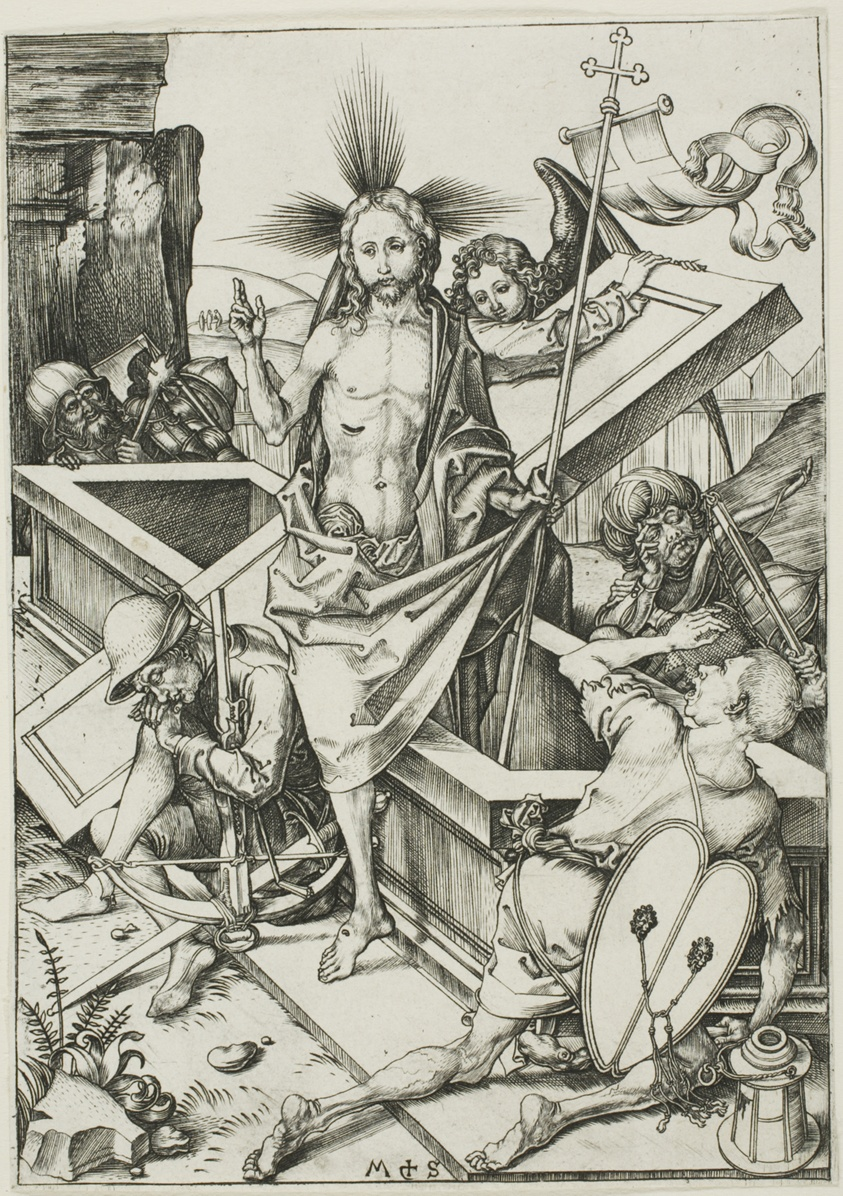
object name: Print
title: The Resurrection, from The Passion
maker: Martin Schongauer (German, c. 1430/50-1491)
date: c. 1470–75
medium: Engraving on paper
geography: Germany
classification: engraving; print; prints and drawing